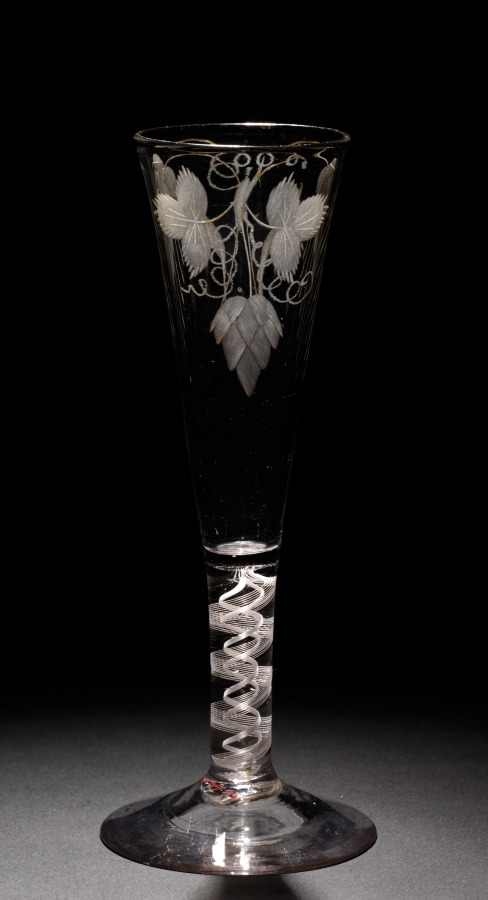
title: Ale Glass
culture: England, 18th century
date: 1750–99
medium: glass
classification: Glass